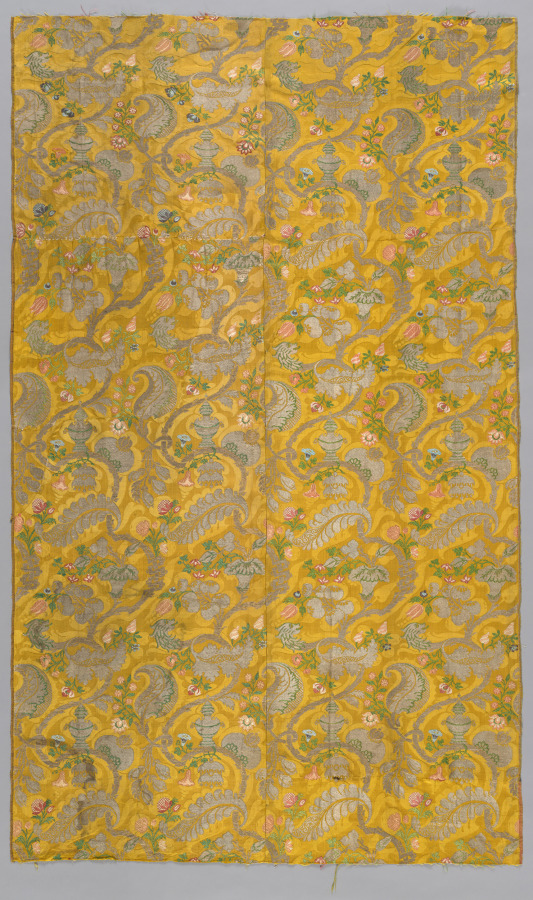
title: Table Cover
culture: Italy, Venice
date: late 1600s - early 1700s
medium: satin weave, brocaded; silk and metal thread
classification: Textile